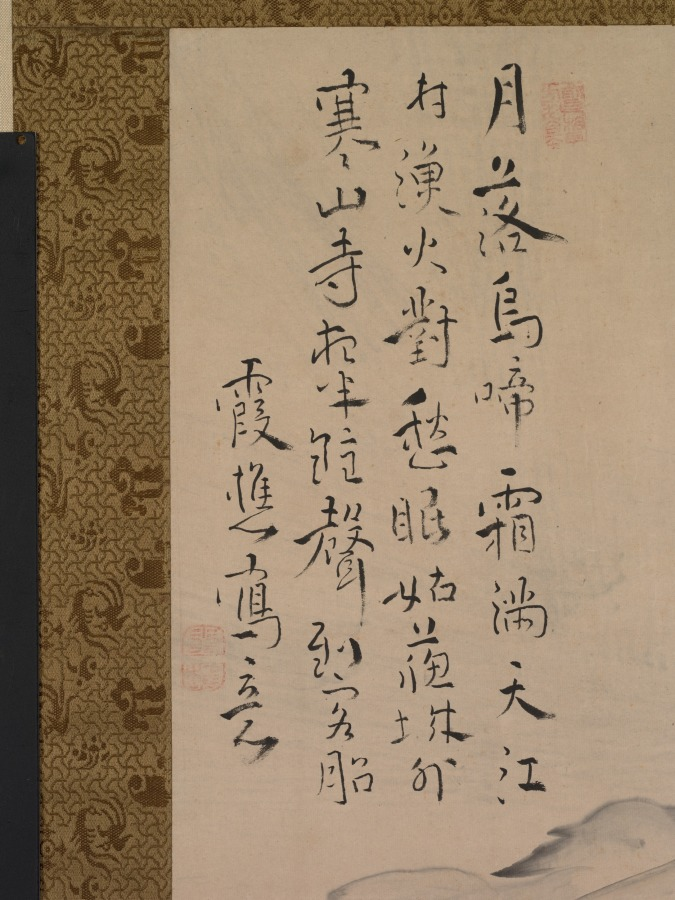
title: Illustration of Zhang Qi's Poem on the Cold Mountain Temple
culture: Japan, Edo period (1615–1868)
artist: Ike Taiga (Japanese, 1723–1776)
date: mid- to late 1700s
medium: hanging scroll; ink and color on paper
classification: Painting